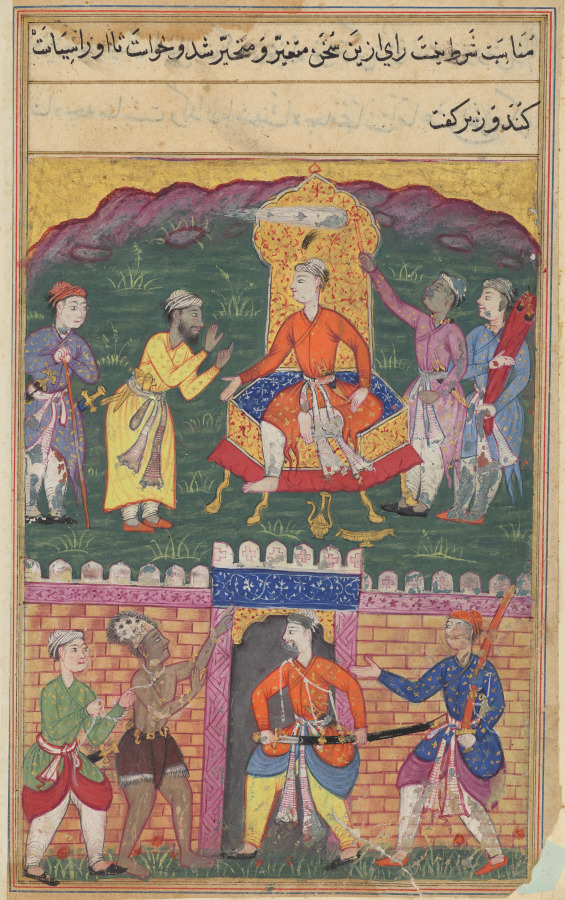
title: The vizier dissuades the king of Bahilistan from executing the dervish who asks for his daughter’s hand in marriage, from a Tuti-nama (Tales of a Parrot): Seventh Night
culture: Mughal India, court of Akbar (reigned 1556–1605)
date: c. 1560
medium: gum tempera, ink, and gold on paper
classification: Painting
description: A poor dervish, wearing a fur cap and short brown lower garment, stands captive before the furious king of Bahilistan. Before he can kill the dervish, a vizier reminds him that it is beneath a king to stain his sword with the blood of a mendicant. The dervish is ordered to prove his worth by offering the king’s daughter an elephant laden with gold.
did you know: Bahilistan was once an independent state in India.